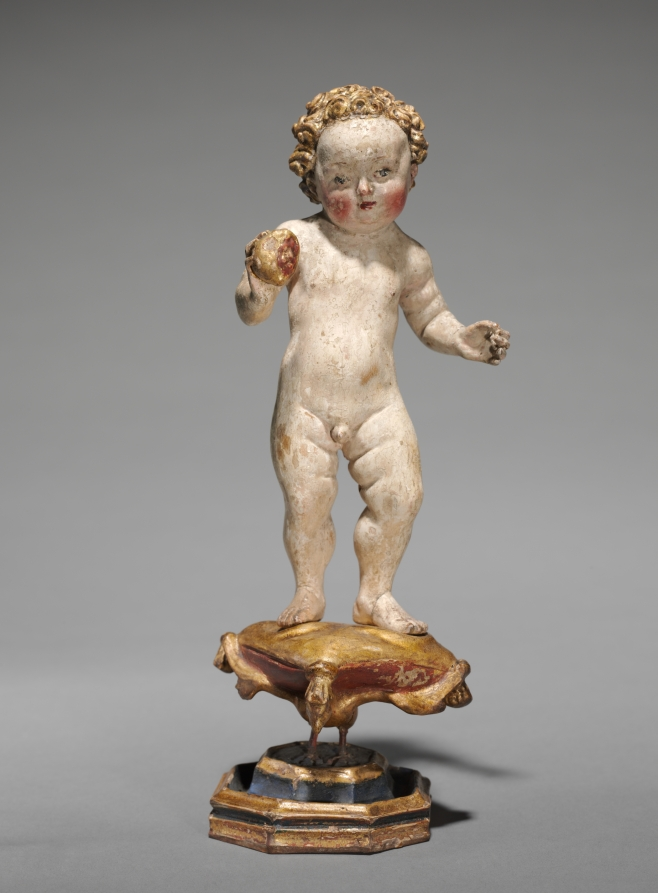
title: The Christ Child Holding a Pomegranate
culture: South Germany, 16th century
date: c. 1510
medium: painted wood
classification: Sculpture